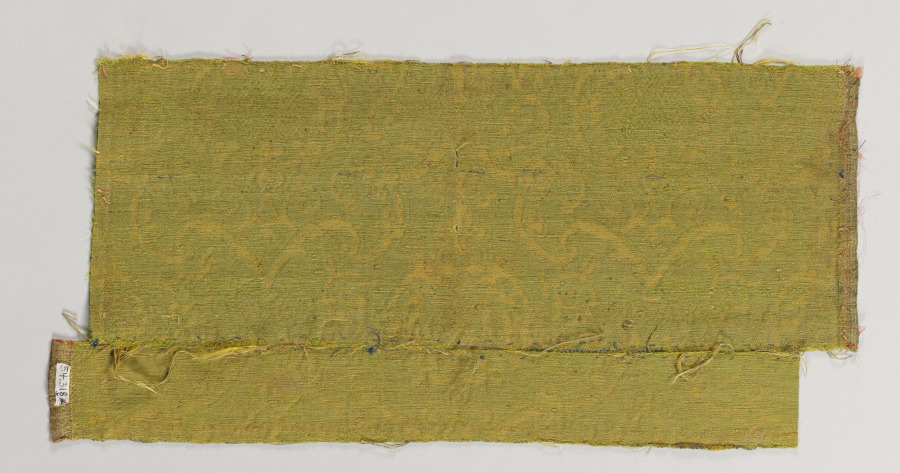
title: Length of Fabric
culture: Italy or Spain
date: 1500s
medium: silk and linen: brocade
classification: Textile